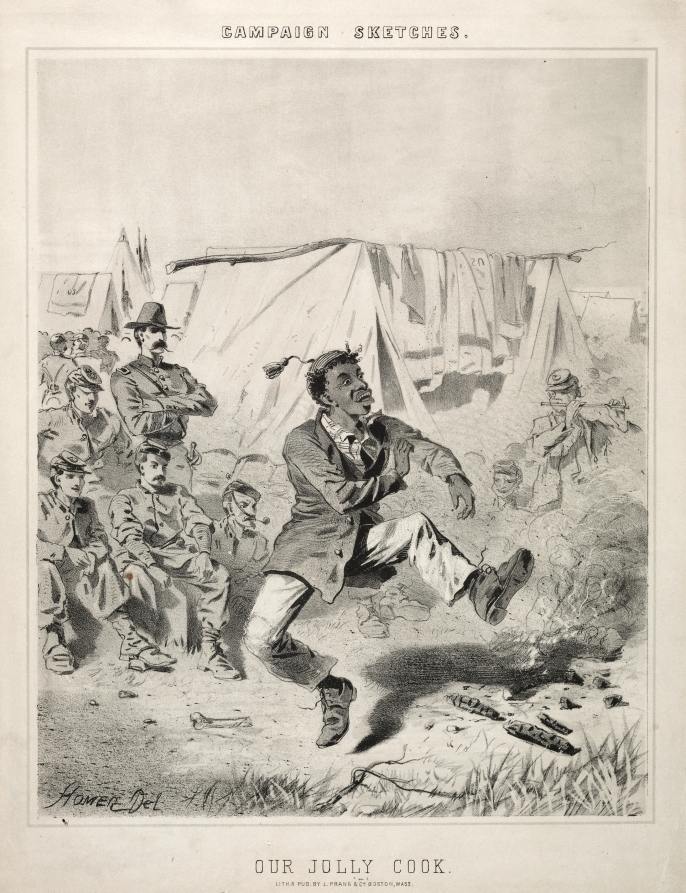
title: Campaign Sketches: Our Jolly Cook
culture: America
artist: Winslow Homer (American, 1836–1910)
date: 1863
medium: lithograph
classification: Print